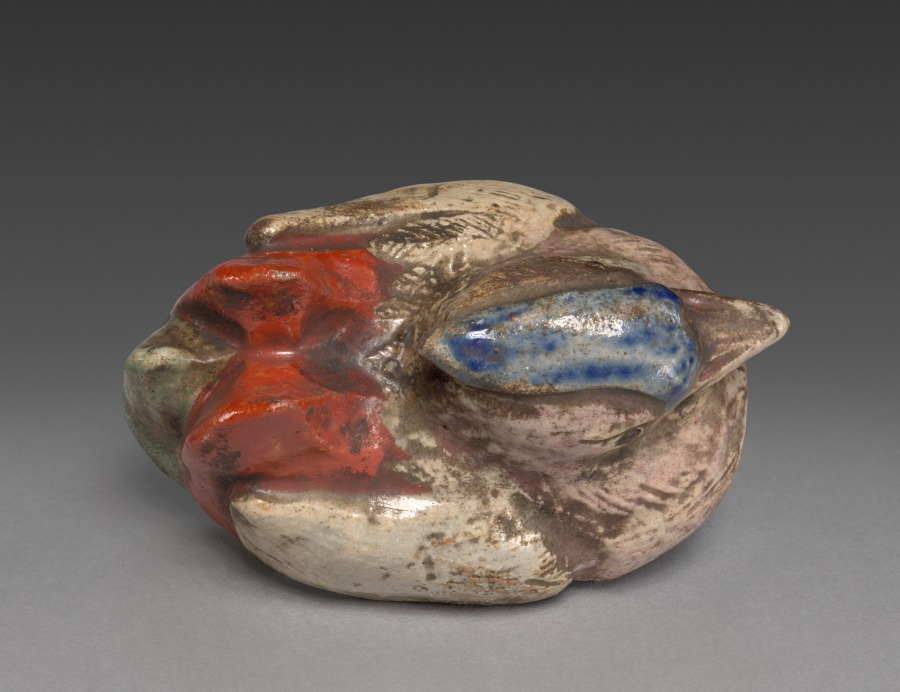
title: Lid of Incense Container (Kōgō) in the Shape of a Mandarin Duck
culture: Japan, Edo period (1615–1868)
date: c. 1700–1868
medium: pottery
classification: Ceramic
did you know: The artist incised the bird's feet on the bottom of the box.